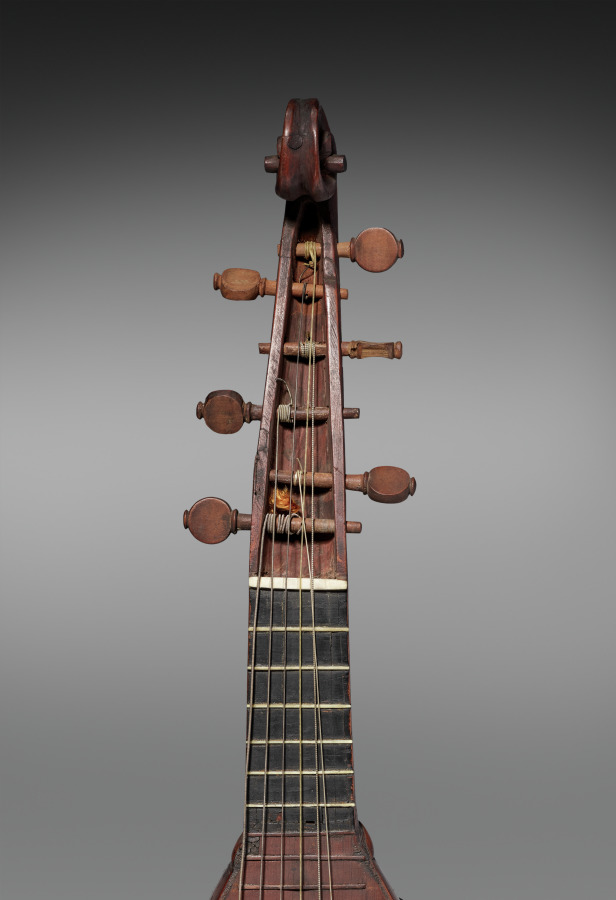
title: Pandurina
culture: Italy, 15th century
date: 1400s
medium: varnished wood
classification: Musical Instrument